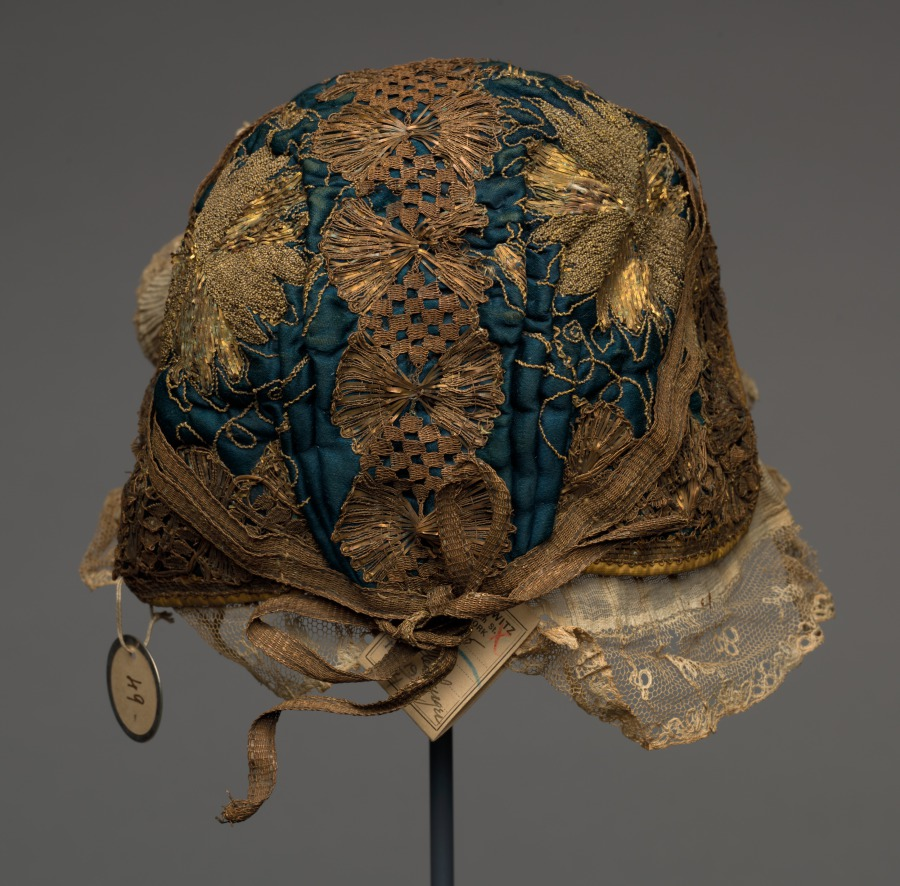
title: Embroidered Cap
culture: Germany, Mecklenburg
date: 1700s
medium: embroidery; satin ground embroidered with gold thread and decorated with gold lace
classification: Garment